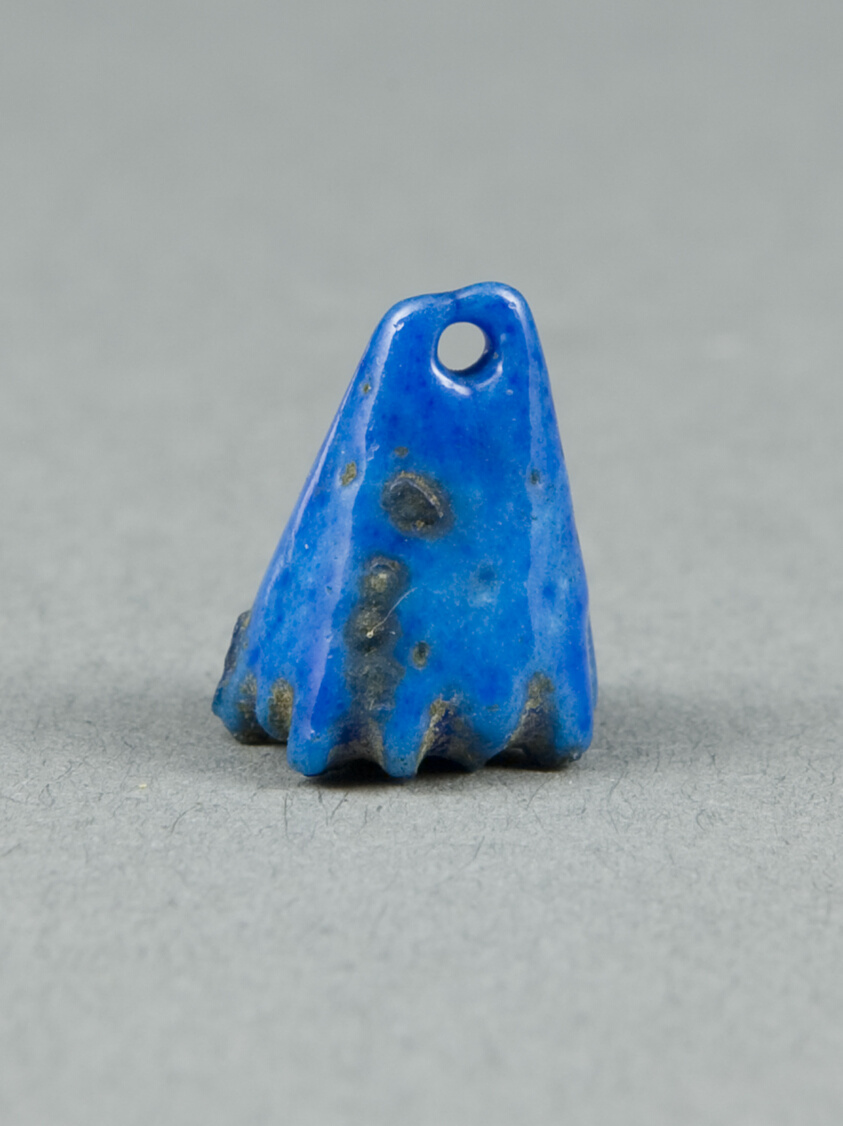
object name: Costume and Accessories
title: Pendant in the Shape of a Lotus Blossom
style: new kingdom, third intermediate period, egyptian, late period (egyptian)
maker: Egyptian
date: New Kingdom–Late Period (about 1550–664 BCE)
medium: Faience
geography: Egypt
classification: pendant (jewelry); jewelry; amulet; ancient art; bead; costume; faïence (composite material)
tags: lotus, flowers